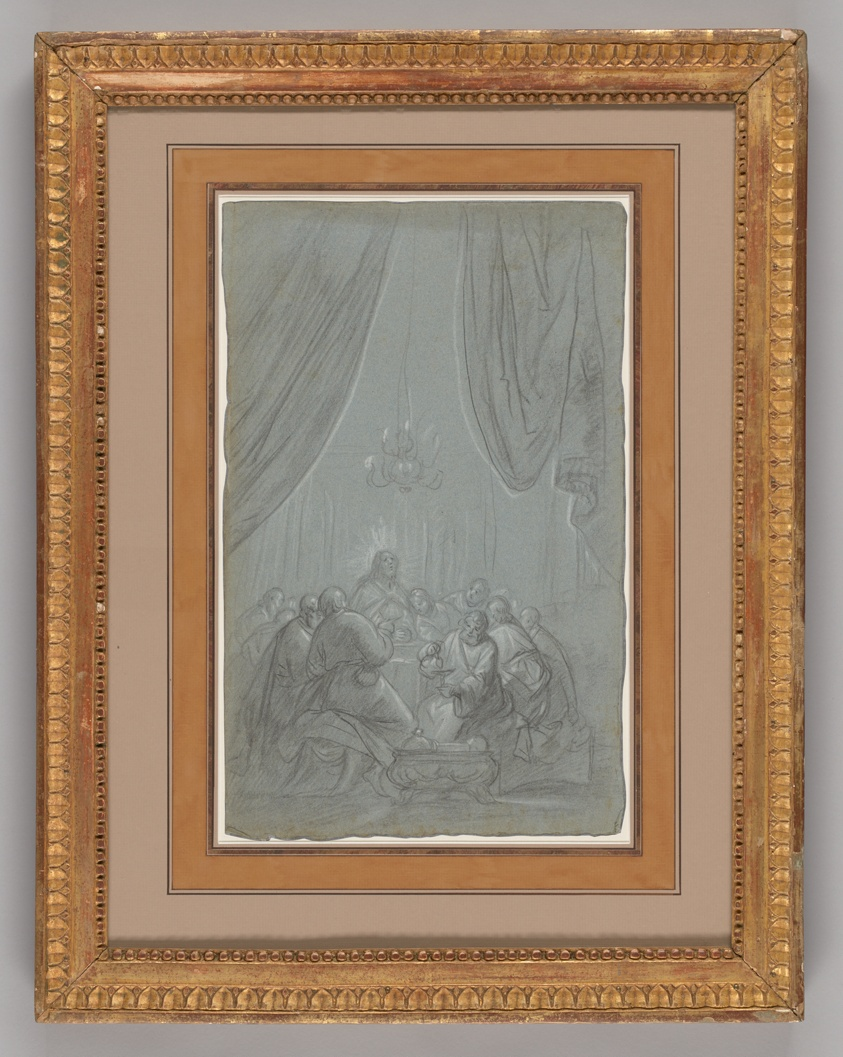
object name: Drawing and Watercolor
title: The Last Supper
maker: Pieter De Grebber; Dutch, c. 1600–c. 1653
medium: Black chalk, heightened with white chalk, on blue laid paper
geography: Netherlands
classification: drawings (visual works); paper; prints and drawing